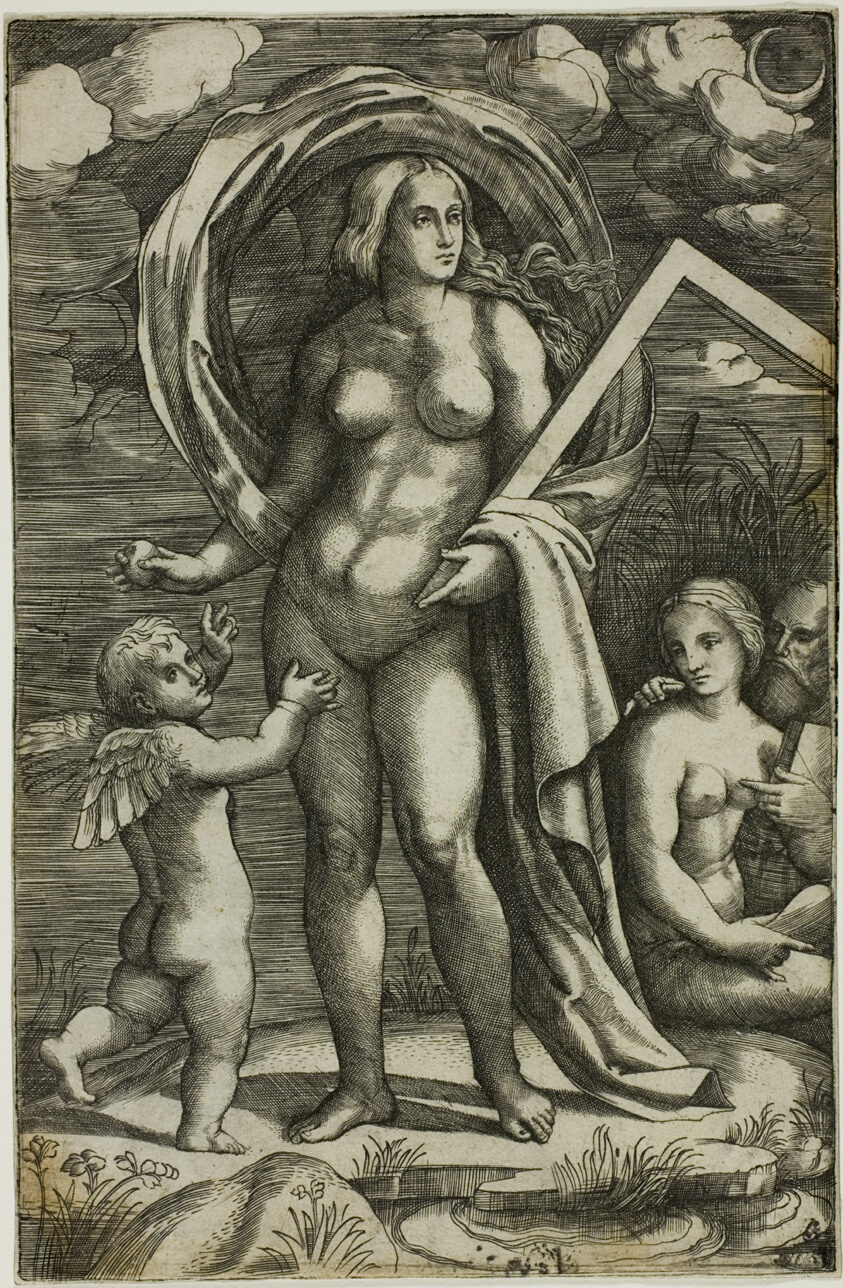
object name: Print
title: Venus and Cupid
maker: Jacopo Francia (Italian, before 1486-1557)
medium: Engraving on paper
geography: Italy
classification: print; prints and drawing